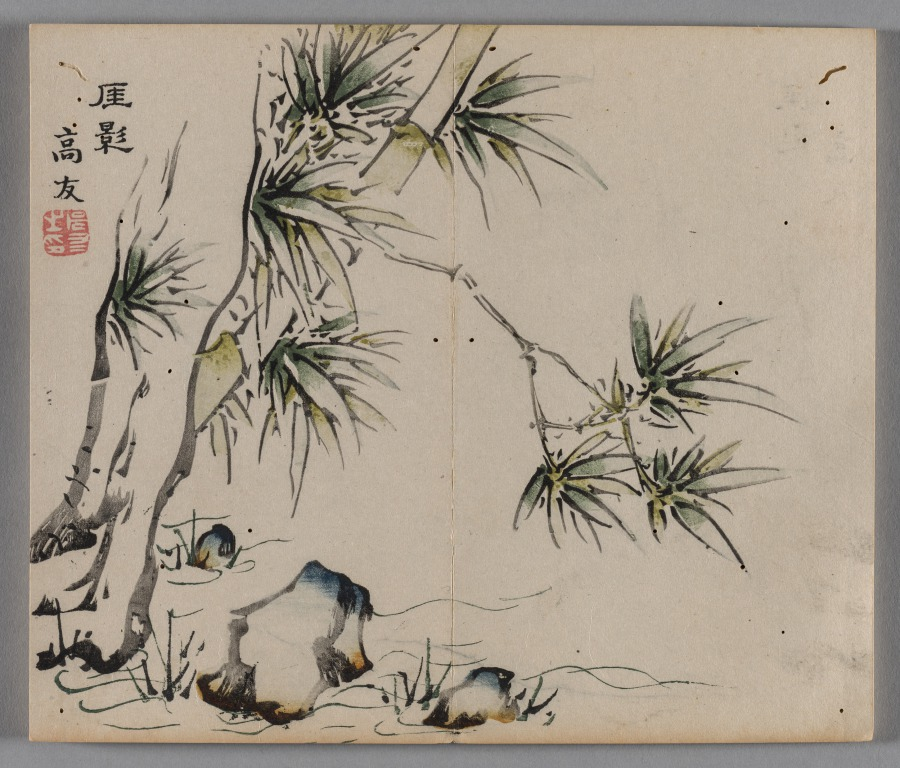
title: Ten Bamboo Studio Painting and Calligraphy Handbook (Shizhuzhai shuhua pu): Bamboo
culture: China, Qing dynasty (1644-1911)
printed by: Hu Zhengyan (Chinese, c. 1584–1674)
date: 1633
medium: Woodblock-printed book; ink and colors on paper; first edition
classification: Print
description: Color printing reached a level of perfection in the early 1600s, as seen in this Ten Bamboo Studio Collection of Calligraphy and Painting and the Mustard Seed Garden Manual of Painting (printed 1679 and 1701). The painterly quality, precision in registering (aligning) the woodblocks, and harmonious colors made them the most successful color print editions in Chinese history. Both editions were printed and compiled in Nanjing, spread nationwide, and had a great impact on the arts in Japan and Korea.